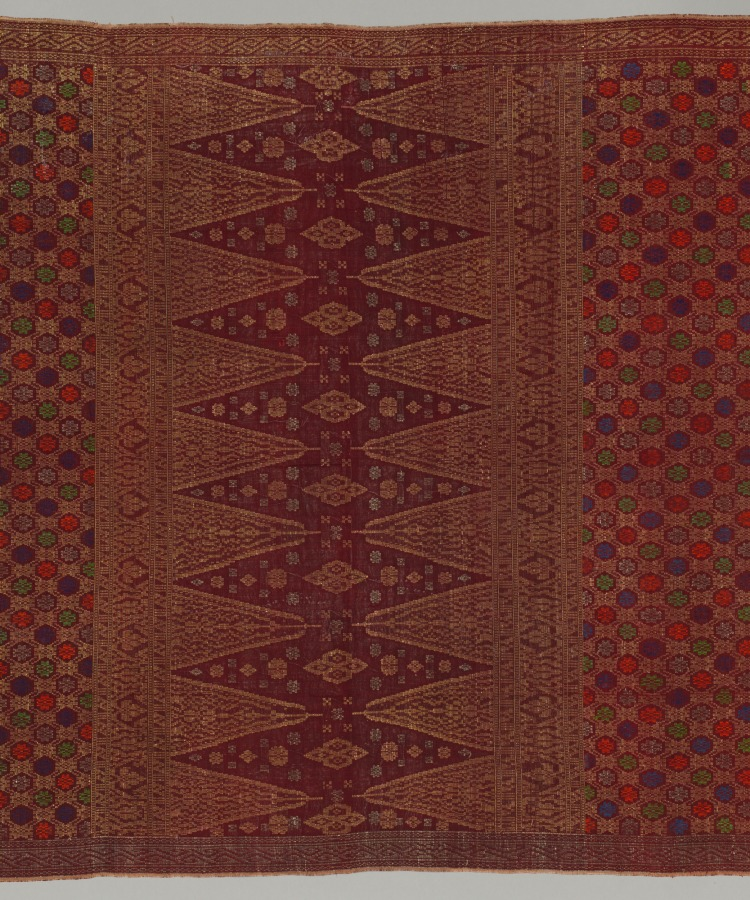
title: Wearing Cloth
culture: Indonesia, Sumatra, Palembang, 1st half 20th century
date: 1900–1950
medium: tabby weave; silk brocaded with silk and metallic threads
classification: Textile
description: The small pattern of rosettes in the main field, the selvage borders, and the tumpal (triangle) border are characteristic of the gold, silver, and red silk cloths woven in the Palembang region. Sumptuous silks of this type were only made in the eastern coastal cities of Sumatra that maintained active trade with China and India. Not only were the silk, gold, and silver threads imported, but the elements of the design were derived from Indian patola (warp and weft ikat) silks. Traditionally, cloths like this were worn for ceremonial occasions and were also used in the exchange of gifts required on the occasion of a wedding.